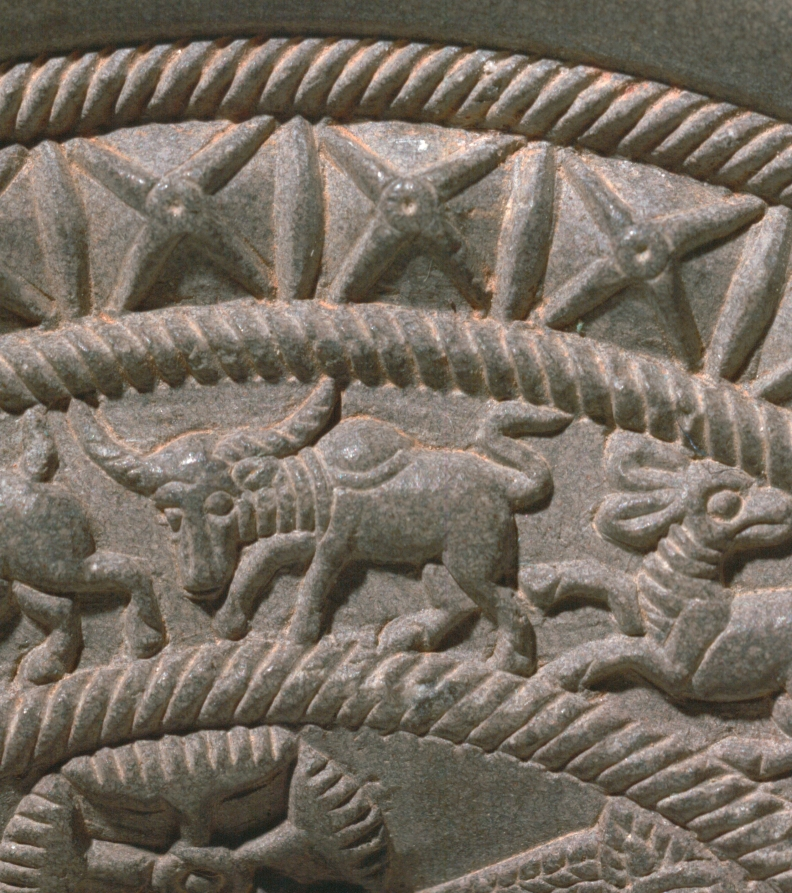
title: Ringstone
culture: India, Maurya period (322–185 BCE)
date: 200s BCE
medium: steatite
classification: Sculpture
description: Ringstones are among the earliest works of art to be created in stone during India's historical period. This example is finely carved with detailed images of affectionate couples and palm trees, running animals, and geometric motifs in concentric circles. The function of ringstones remains uncertain, since none of the surviving examples is inscribed or explained in a text.